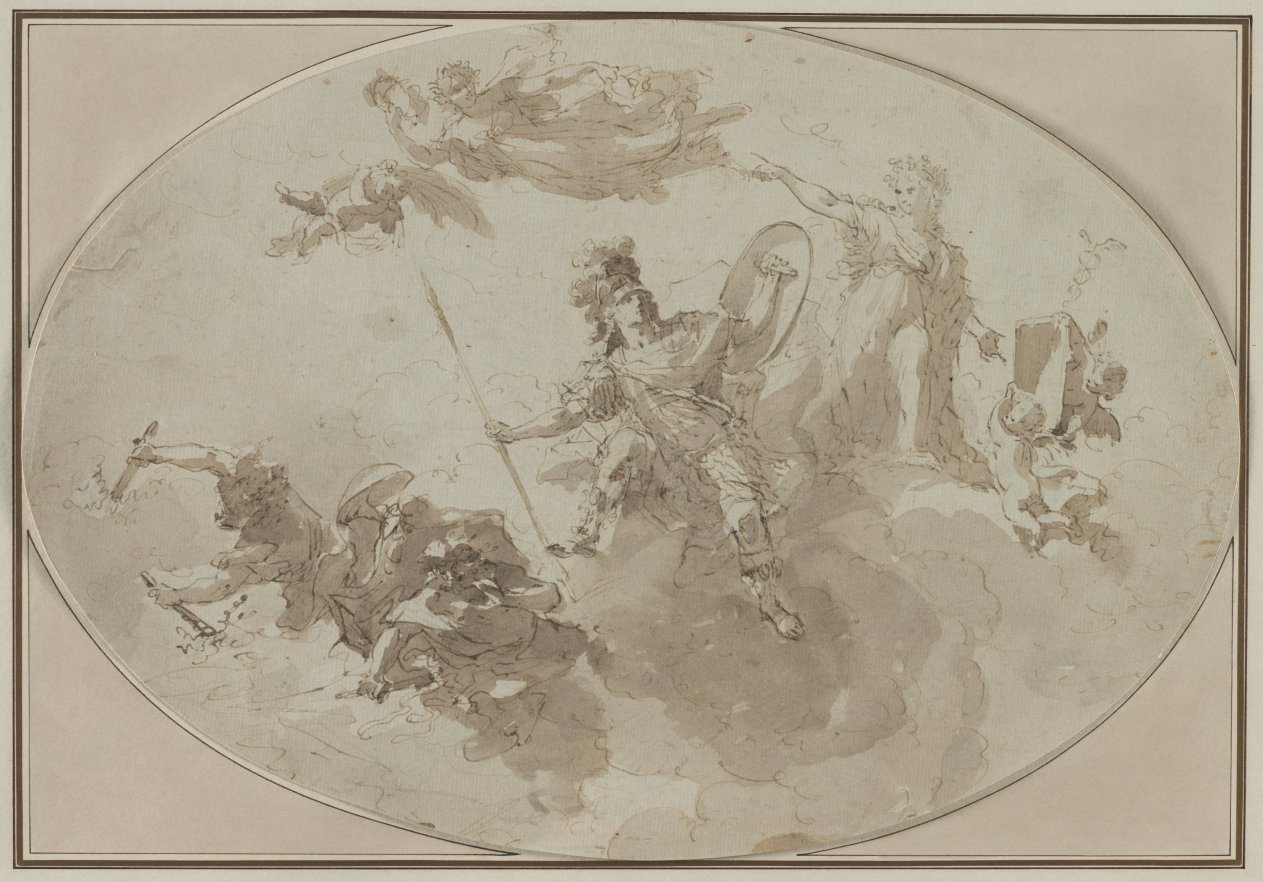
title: Ceiling Study: Allegory of Peace and War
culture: Italy, late 18th-early 19th Century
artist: Giuseppe Bernardino Bison (Italian, 1762–1844)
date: c. 1800 ?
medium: pen and brown ink and brush and brown wash over black chalk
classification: Drawing